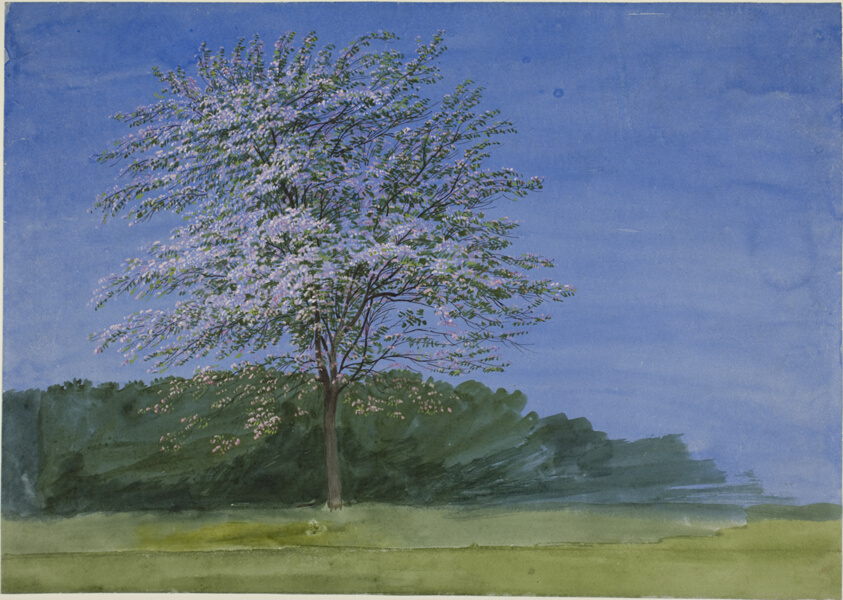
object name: Drawing and Watercolor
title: Study of a Tree in Bloom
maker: William Turner (English, 1789-1862)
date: c. 1835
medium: Watercolor and gouache on ivory wove paper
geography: England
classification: watercolor; drawings (visual works); prints and drawing